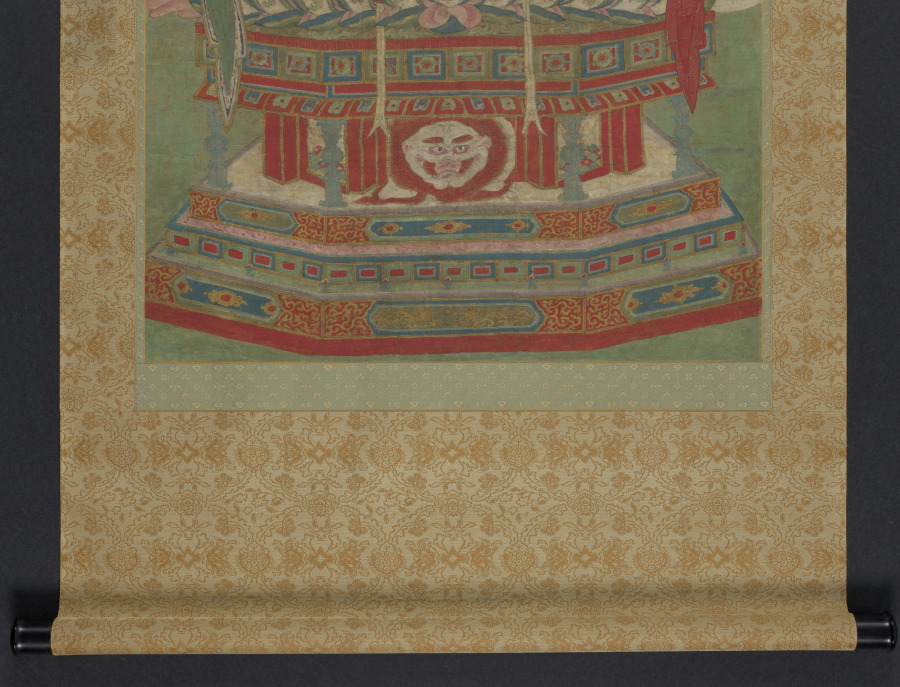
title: Seated Amitābha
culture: Chinese, Ming dynasty (1368-1644)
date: late 1500s–early 1600s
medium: hanging scroll; ink and color on silk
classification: Painting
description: This magnificent Buddha, called Amitābha (literally, “infinite light”) is seated on a lotus pedestal with both palms facing up over crossed legs, suggesting that it is in deep meditation. In contrast to the richly ornamented throne on which the Buddha is seated, the figure itself is devoid of any jewelry or decorative attributes, emphasizing its enlightened status and detachment from worldly affairs. The lion head in the center of the pedestal is a motif from Central Asia, which can also be seen in the halo or nimbus of Chinese Buddhist stone steles.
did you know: Originally, this scroll was acquired by the museum as a Korean work, but has now been tentatively reattributed as Ming period Chinese.